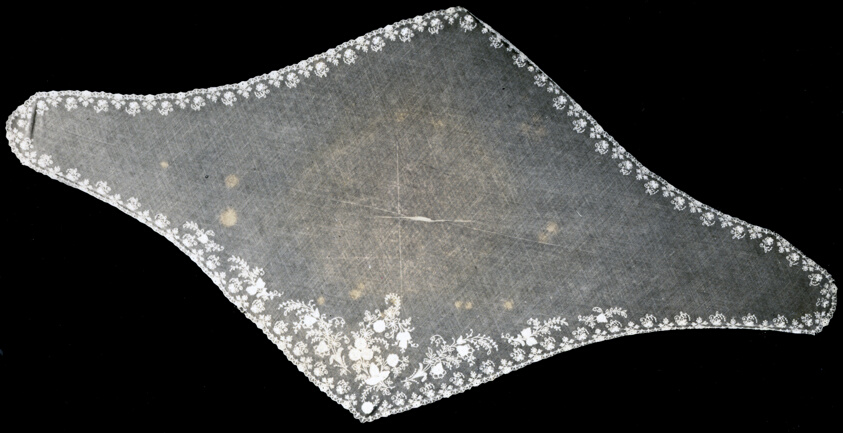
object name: Textile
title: Fichu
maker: Probably France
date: 1850/75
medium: Cotton, machine-made twist net; embroidered in chain stitches (tambour work) and appliquéd with plain weave; embroidered in chain, darning, overcast, and satin stitches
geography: France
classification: textile; lace - mixed